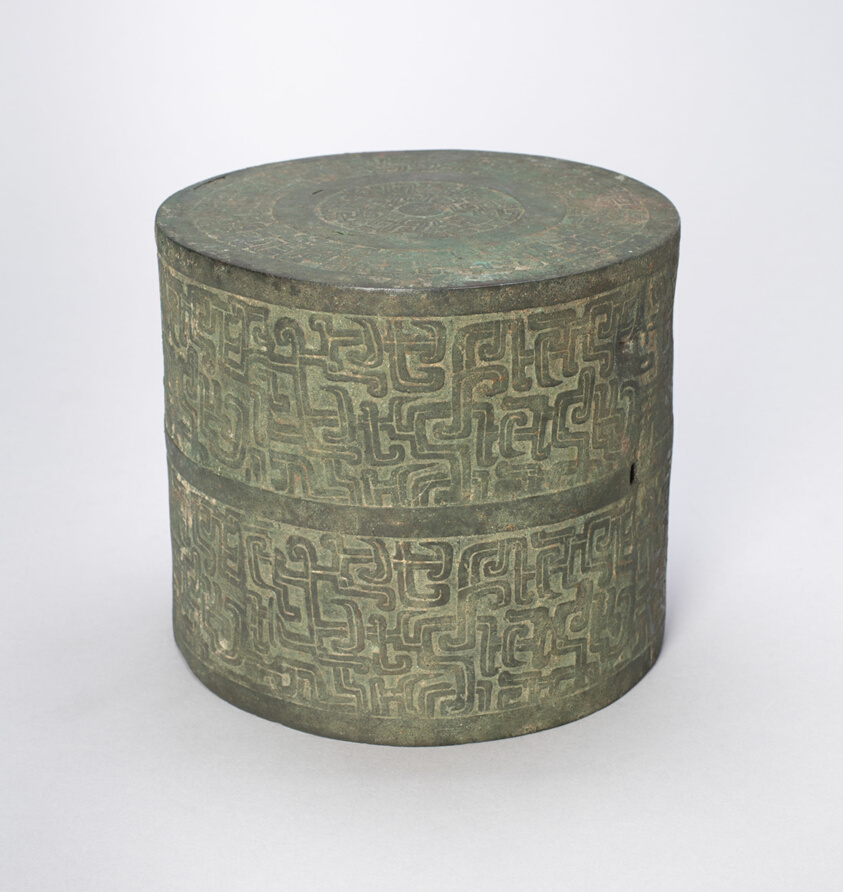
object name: Architectural fragment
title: Architectural Fitting (Gong)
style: Chinese (culture or style)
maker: China, Qishan county, Shaanxi province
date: Eastern Zhou dynasty, Spring and Autumn period (770–481 B.C.), 7th century B.C.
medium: Bronze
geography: China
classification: architectural fragment